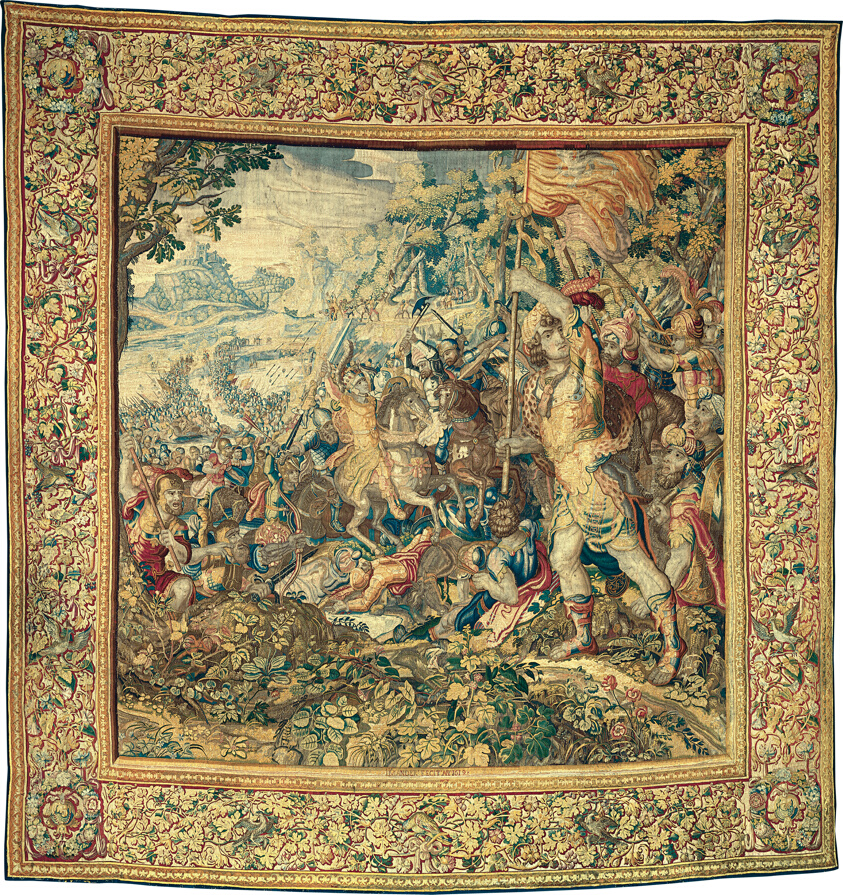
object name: Coverings and Hangings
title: The Crossing of the Granicus, from The Story of Alexander the Great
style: Renaissance, european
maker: After a design by, and woven at the workshop of, Karel van Mander the Younger (1579–1623); Holland, Delft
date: 1619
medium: Wool and silk, slit and double interlocking tapestry weave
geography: Holland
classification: weaving - tapestry; textile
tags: war, battles, alexander the great